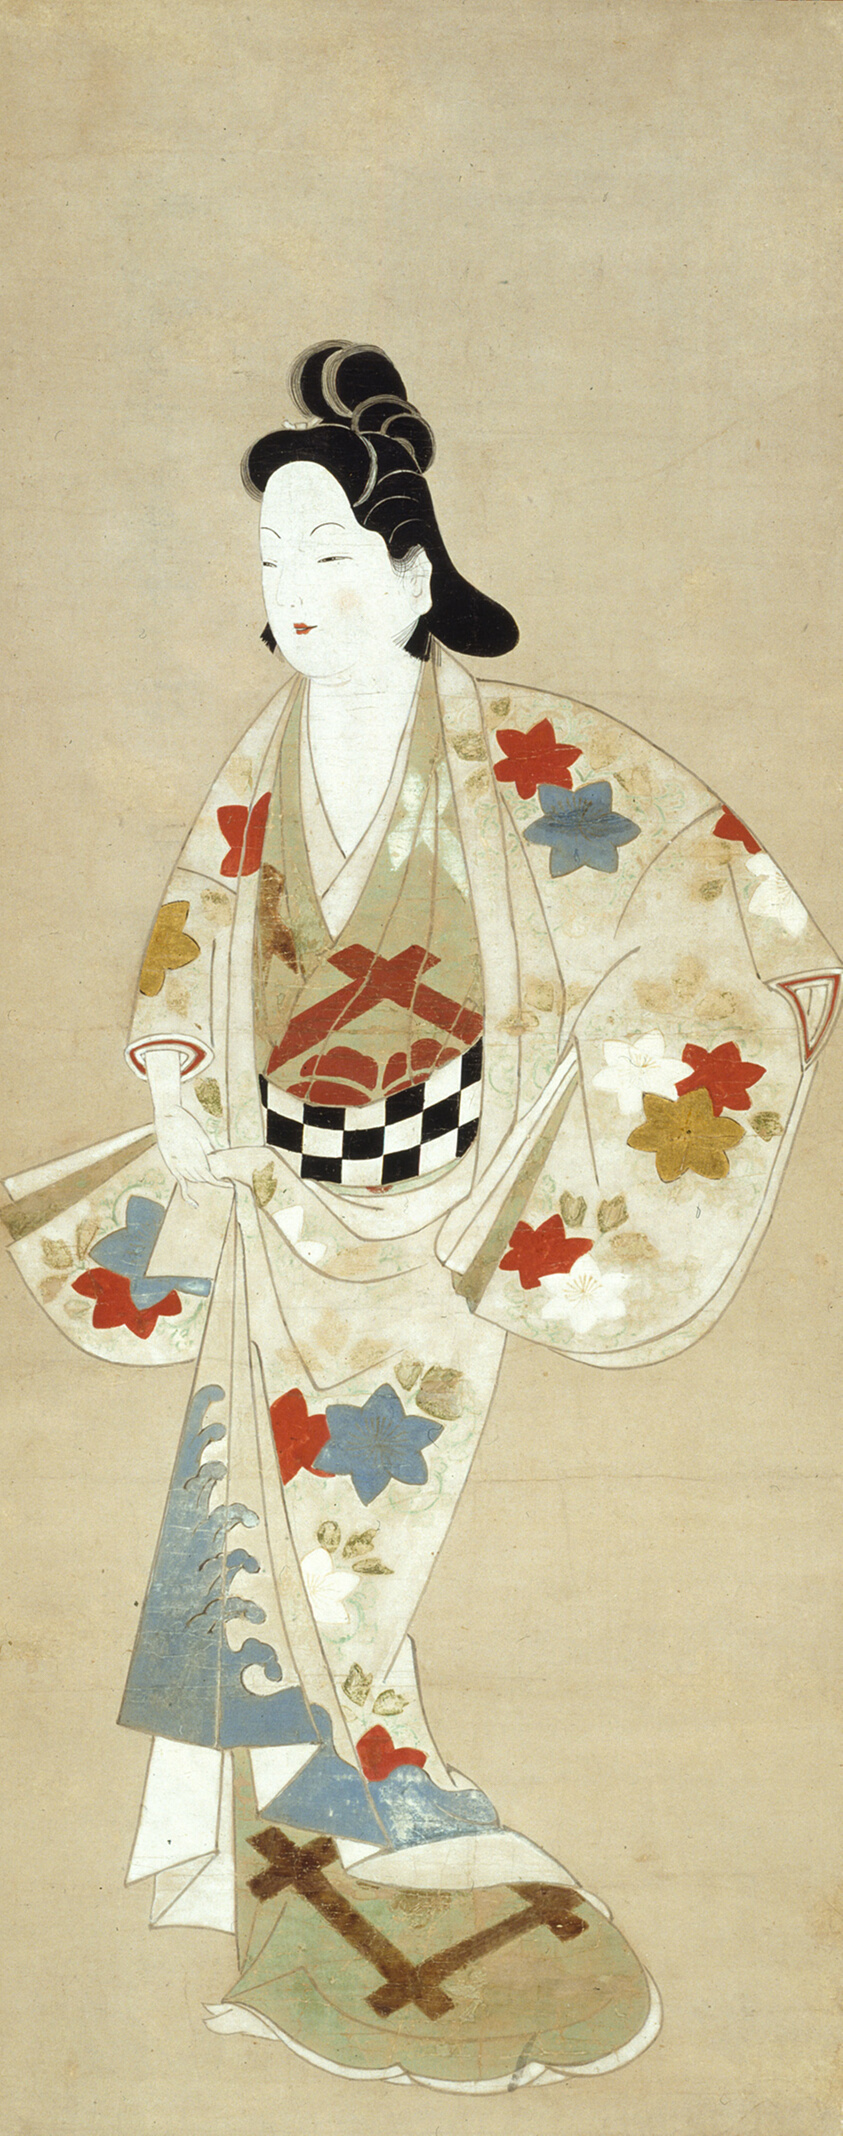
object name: Painting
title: Standing Beauty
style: Japanese (culture or style)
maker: Artist unknown; Japanese, active 17th century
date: 1661/73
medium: Hanging scroll; ink, color, and gold on paper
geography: Japan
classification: hanging scroll; painting; asian art